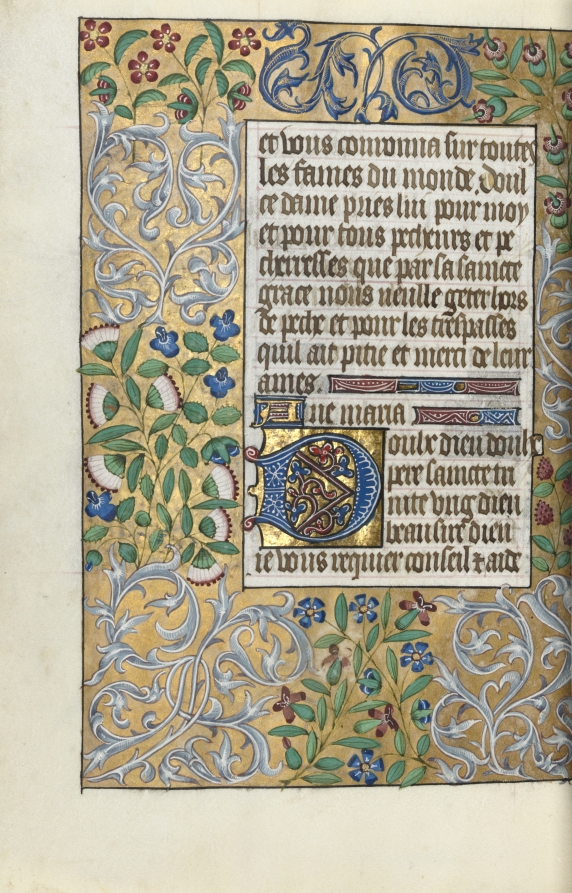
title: Book of Hours (Use of Rouen): fol. 151v, Elaborate Border of Foliage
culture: France, Rouen, 15th century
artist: Master of the Geneva Latini (French, active Rouen, 1460–80)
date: c. 1470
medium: ink, tempera, and gold on vellum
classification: Bound Volume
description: In the late 1400s and early 1500s Rouen was an established and important center of book production. The city’s cathedral had a wealthy chapter that spent large sums of money to commission books and to maintain its extensive library. The stationers and booksellers would have likely been concentrated in or near the cathedral precinct. This artist, named after a manuscript now in Geneva, was Rouen’s principal illuminator during the second half of the 1400s.